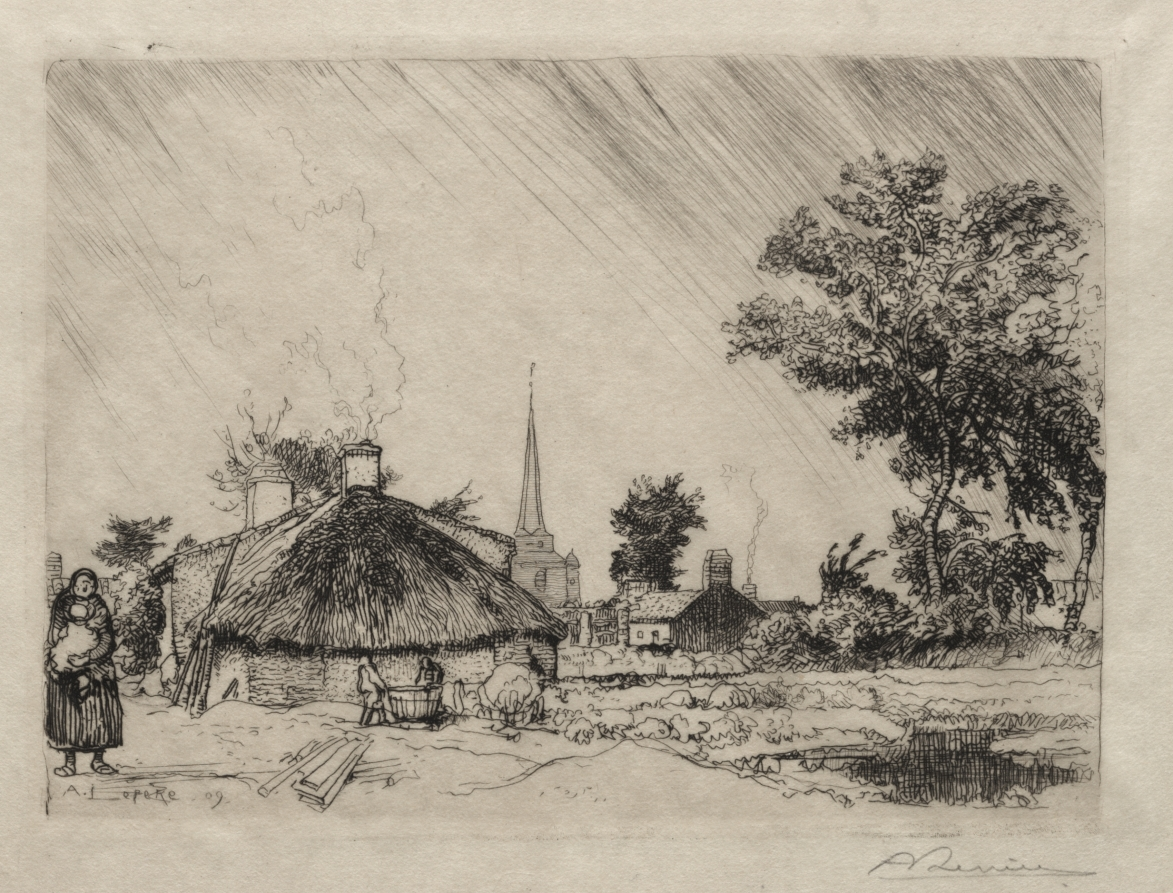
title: The Shower: St. Jean-de-Monte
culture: France, 20th century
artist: Auguste Louis Lepère (French, 1849–1918)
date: 1909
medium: etching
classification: Print